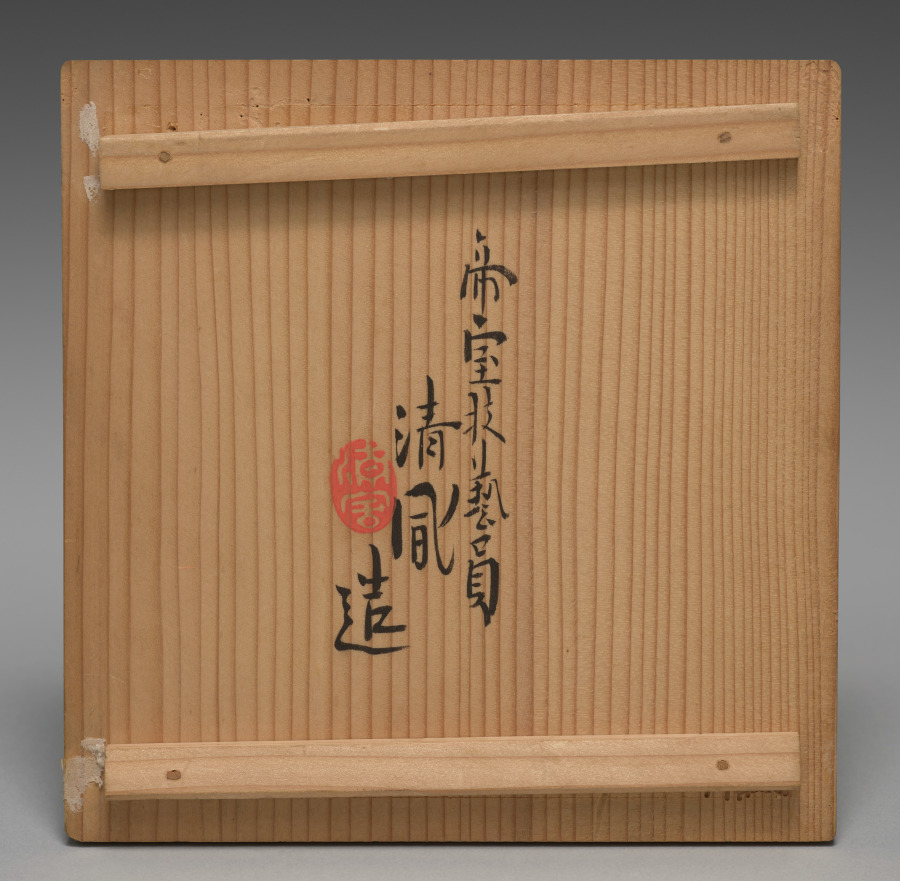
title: Sake Pourer with Flowers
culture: Japan, Meiji period (1868–1912)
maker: Seifū Yohei III (Japanese, 1851–1914)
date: 1893–1914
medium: Porcelain with molded design, overglaze color enamel, and metal handles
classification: Ceramic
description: This sake pourer is of a type called a chōshi. It is elaborately decorated with flowers in overglaze enamels in several colors, including black for the contour lines of leaves and stems; orange, white, gold, and two shades of green for the peonies; and purple for the thistles. The white blossoms have been built up with white enamel, then incised for a white-on-white eect; the orange and purple use an absence of color to produce the contours of individual petals. Yohei III referred to his works in multicolor overglaze enamels as “hundred flower brocades” (hyakka nishiki). Two small nyoi (C. ruyi) staff-head motifs, molded in clay and applied to either side of the lid, create handle rests, as well as natural places for the thumb and index finger of one hand to rest, so one can both secure the lid and steady the pour, while the handles are held in the other hand. The top of a nyoi staff resembles the curled cap of the reishi. Such scepters are imagined to be found in the hands of sages, Daoist immortals, or Buddhist deities and connote lofty goings-on and favorable circumstances. Since this sake pourer is unsigned, it may have been made for imperial family members to give as a gift.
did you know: This sake pourer with purple thistles and orange peonies shows off Seifū Yohei III’s technique of enamels painted over the glaze.